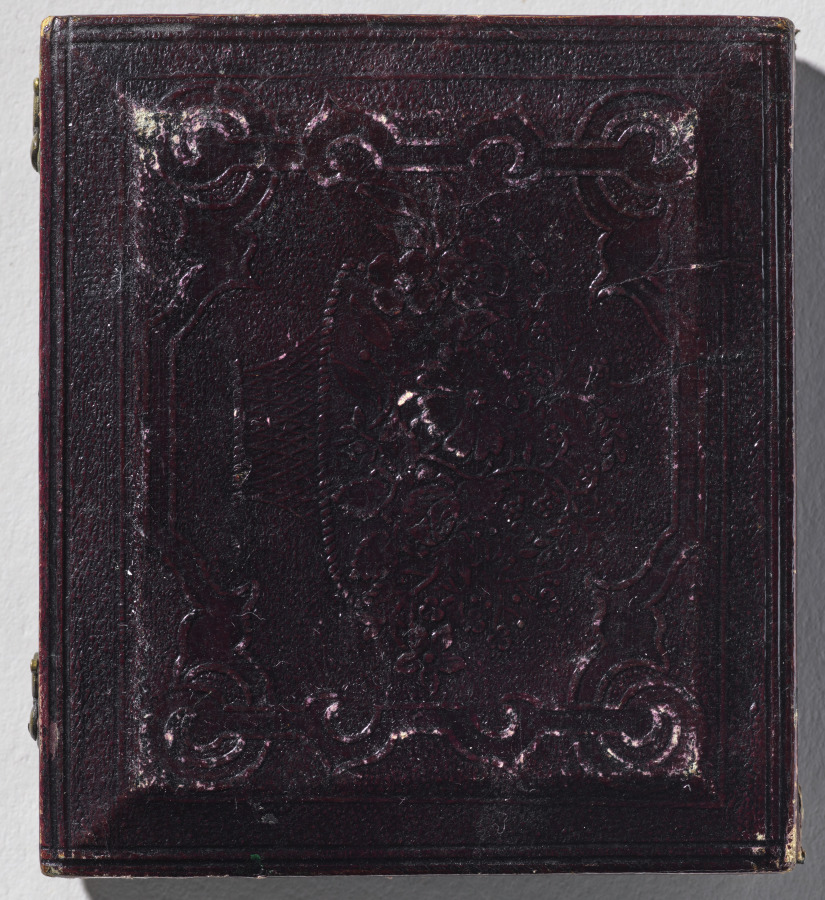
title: Mother and Child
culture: America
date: c. 1860–65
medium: daguerreotype, applied color, sixth-plate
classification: Photograph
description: Some of the most inventive and technically skilled practitioners in the early history of photography are as yet unidentified. However, with time more of these individuals will probably be recognized by name. Introduced into America soon after its invention in 1839 by the Frenchman Louis-Jacques-Mandé Daguerre, the daguerreotype flourished from 1840 to the mid-1860s. This beautiful daguerreotype in its original case is an outstanding example of a very popular subject: mother and child. The polished silver plate precisely renders in warm tones the likeness of the elaborately dressed sitters. The mother gently steadied the child's head so that it would not move during the long exposure required by the daguerreotype process. Clearly, the maker's knowledge of chemistry and traditional principles of design were necessary for this charming portrait.